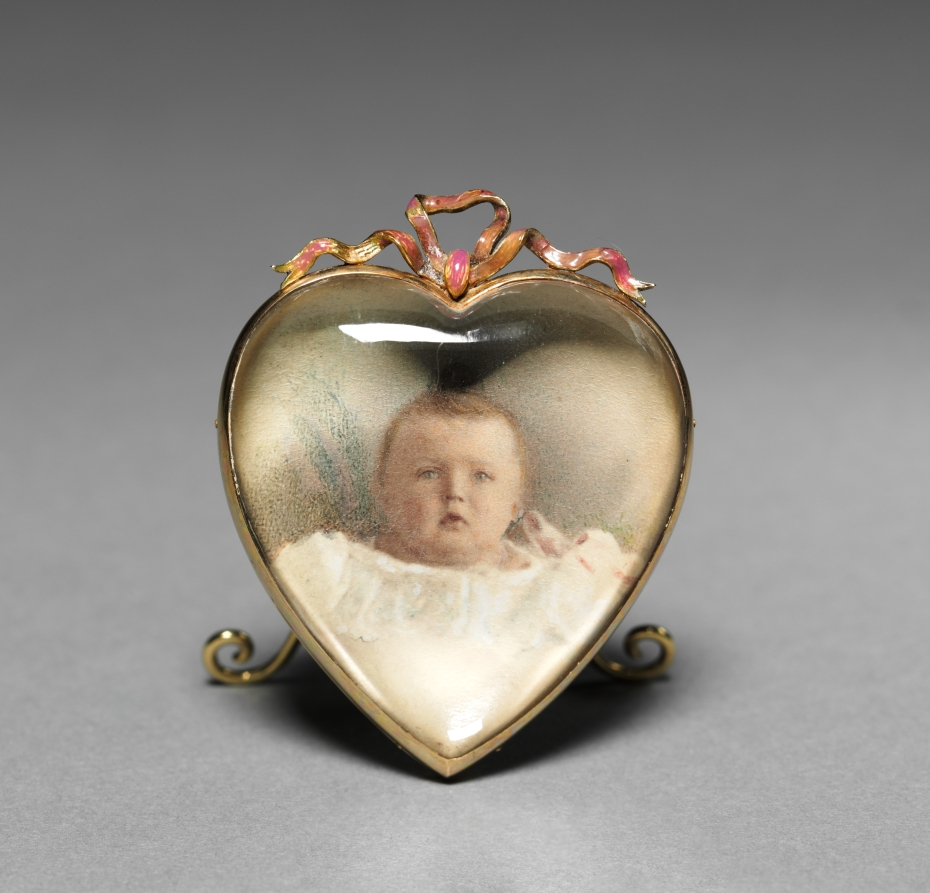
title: Heart-shaped Frame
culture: Russia, St. Petersburg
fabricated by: Mikhail Evlampievich Perkhin (Russian, 1860–1903)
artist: firm of Peter Carl Fabergé (Russian, 1846–1920)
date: before 1896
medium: gold, enamel, glass, photograph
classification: Miscellaneous